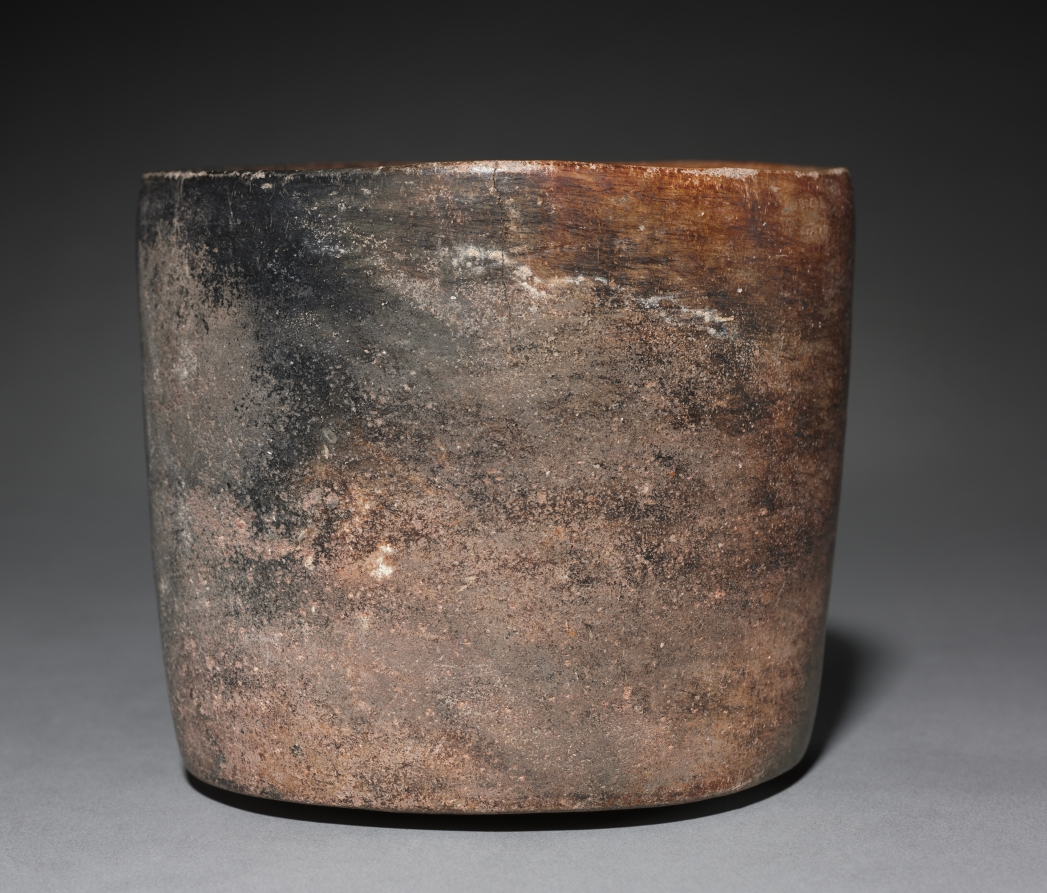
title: Carved Bowl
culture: Mexico, Central Highlands, Olmec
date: 1200–900 BCE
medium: earthenware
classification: Ceramic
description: Although the Olmec heartland is located on Mexico's Gulf Coast, sites with Olmec-style architecture and sculpture are also found in the highlands of Central Mexico. Small-scale Olmec works in jade and pottery are even more widely distributed; their ownership probably conferred great prestige.